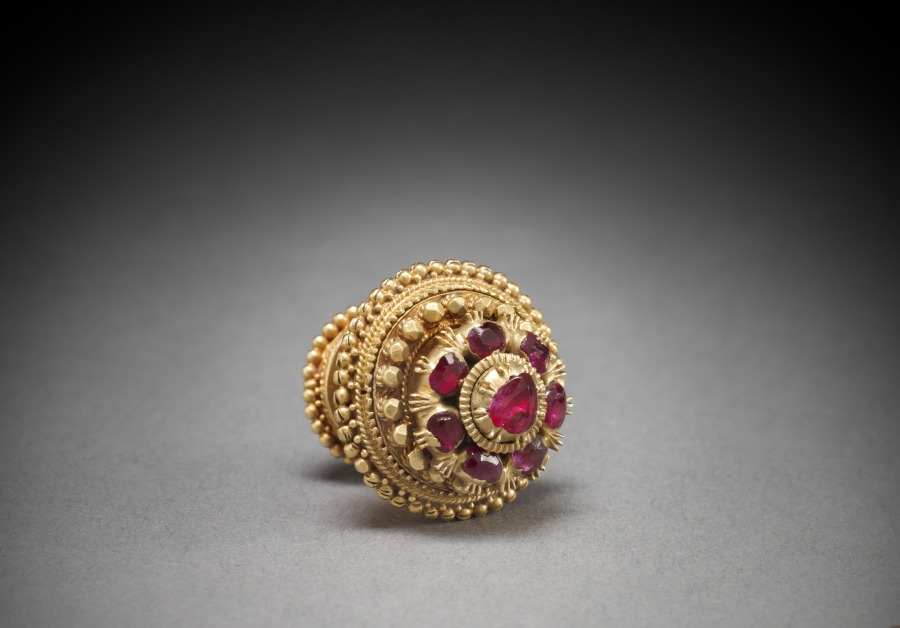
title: Pair of Ear Studs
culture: Burma (?)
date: 1800s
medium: gold and rubies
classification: Jewelry